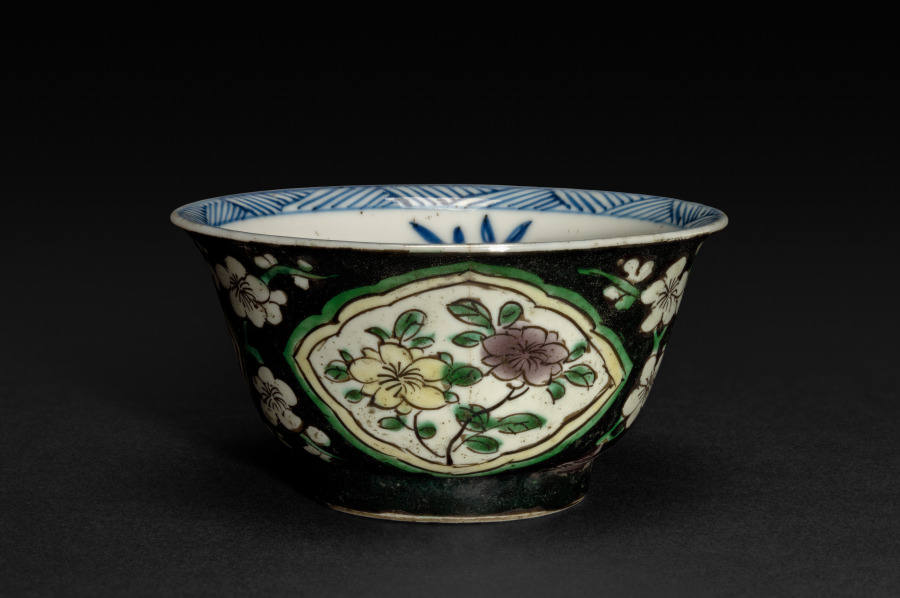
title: Cup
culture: China, Qing dynasty (1644-1911), Kangxi reign (1662-1722)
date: 1662–1722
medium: porcelain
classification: Ceramic